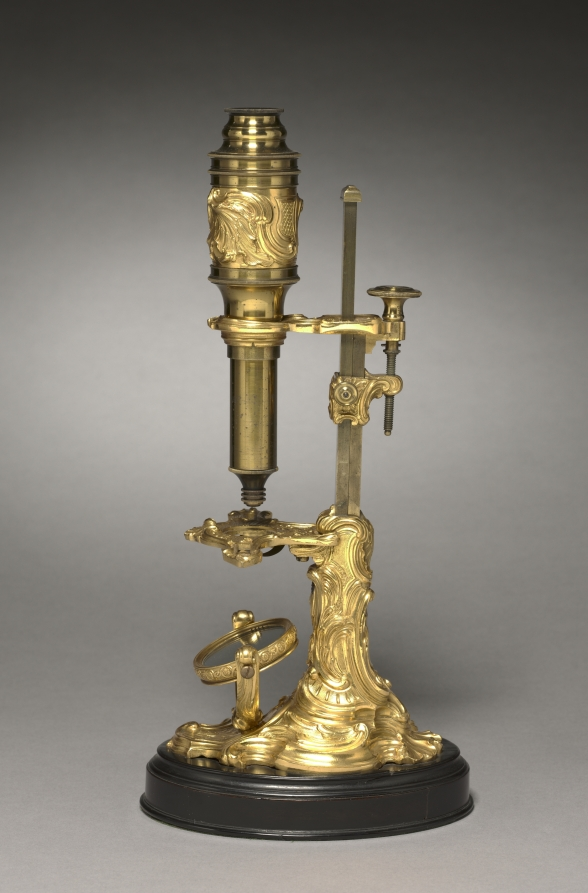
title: Microscope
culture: France, mid-18th century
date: c. 1745– 1765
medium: gilt bronze mounts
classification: Metalwork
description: Composed of elaborate gold-plated parts, this microscope is not just a decorative work of art; it is also a functional tool for scientific inquiry. Its ornamentation reflects the intermingling of art and science during the European Enlightenment, an era when scholars emphasized the study of science and reason as a means of social and intellectual progress. The two lenses of a compound microscope allow for better focus and magnification, making it easier for scientists—amateur and professional alike—to look closer at a specimen to see more than can be seen by the naked eye. This microscope’s ornate decoration suggests it was probably owned by a wealthy person, possibly an amateur scientist. A version of an 18th-century English poem playfully describes what can be newly seen with a microscope: Great fleas have little fleas Upon their backs to bite ’em The little fleas have lesser fleas And so ad infinitum.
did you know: Microscopes, especially ones as elaborate as this example, were luxurious symbols of enlightened aristocratic sophistication in the 1700s.